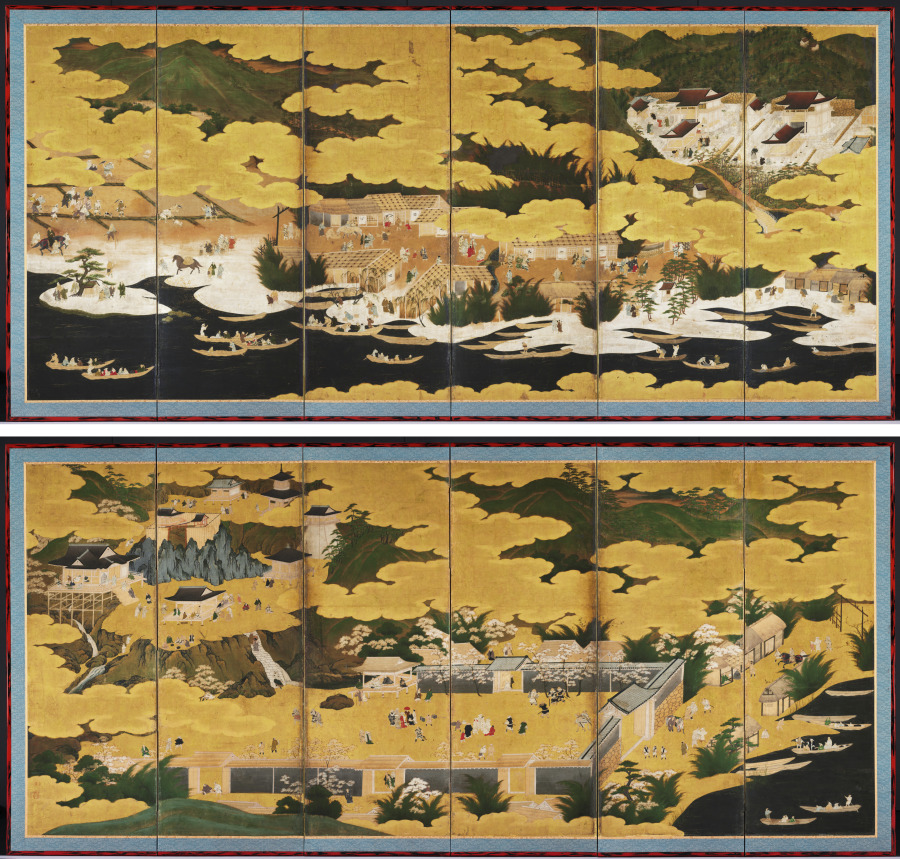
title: Famous Views of Ōmi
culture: Japan, Edo period (1615–1868)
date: 1660s–90s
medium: pair of six-panel folding screens; ink, color, and gold on gilded paper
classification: Painting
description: Ōmi is an area around Lake Biwa near Kyoto. The Shinto shrine Hiyoshi Taisha and the Buddhist temple Ishiyamadera are in the upper right and upper left of the composition, respectively. At center is the pilgrimage route, and people in the town before the temple gates. Harvested rice fields at right and cherry blossom trees in flower at left show seasonal change from winter to spring.